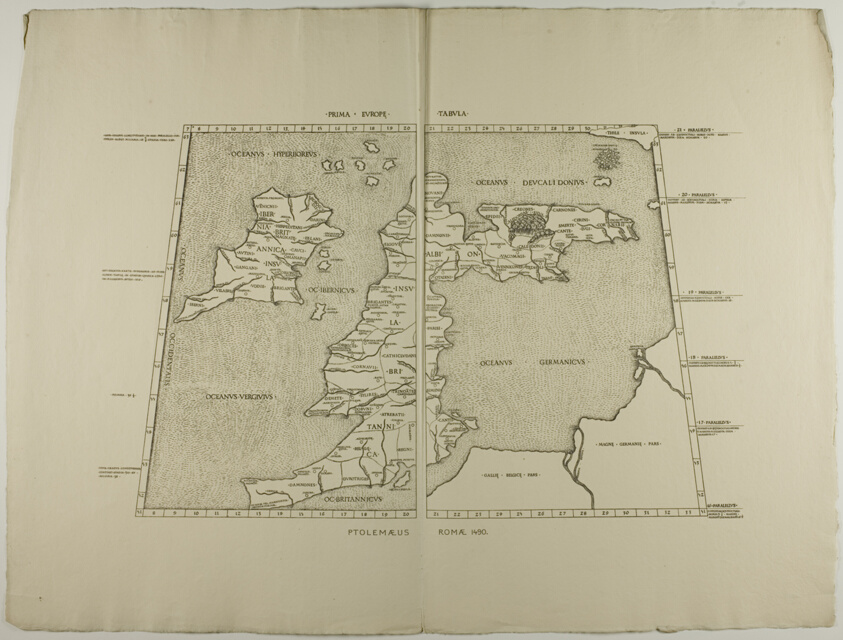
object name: Print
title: Prima Europe Tabula: Ptolemaeus Romae 1490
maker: Unknown Artist; English, 19th century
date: 1490, reprinted 1889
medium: Woodcut in black on cream laid paper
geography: England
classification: reproduction; print; prints and drawing